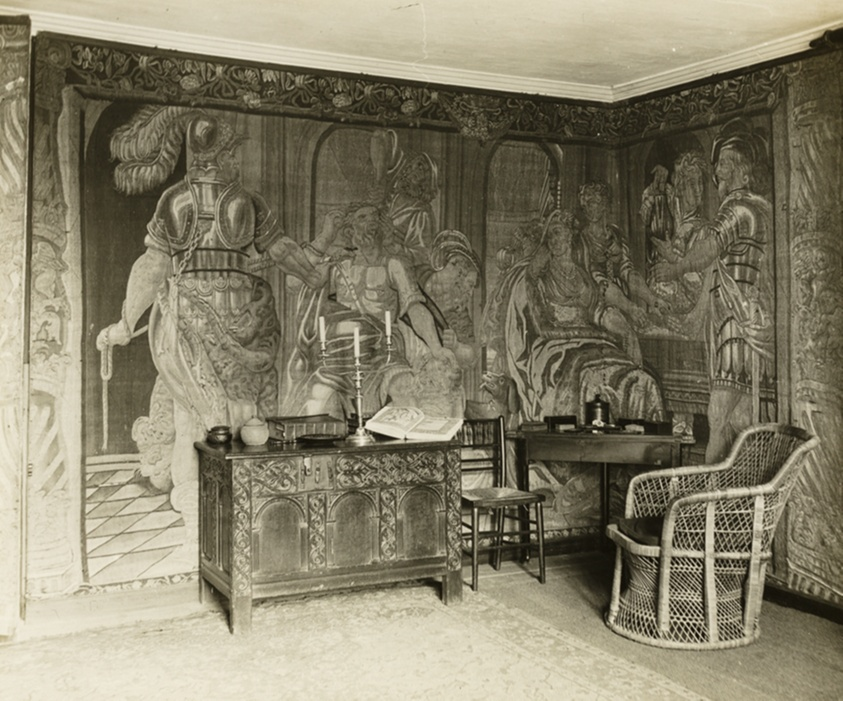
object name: Photograph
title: Kelmscott Manor: In the Tapestry Room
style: Pictorialism, 19th century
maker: Frederick H. Evans (English, 1853–1943)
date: 1896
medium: Lantern slide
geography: England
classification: photograph; photography